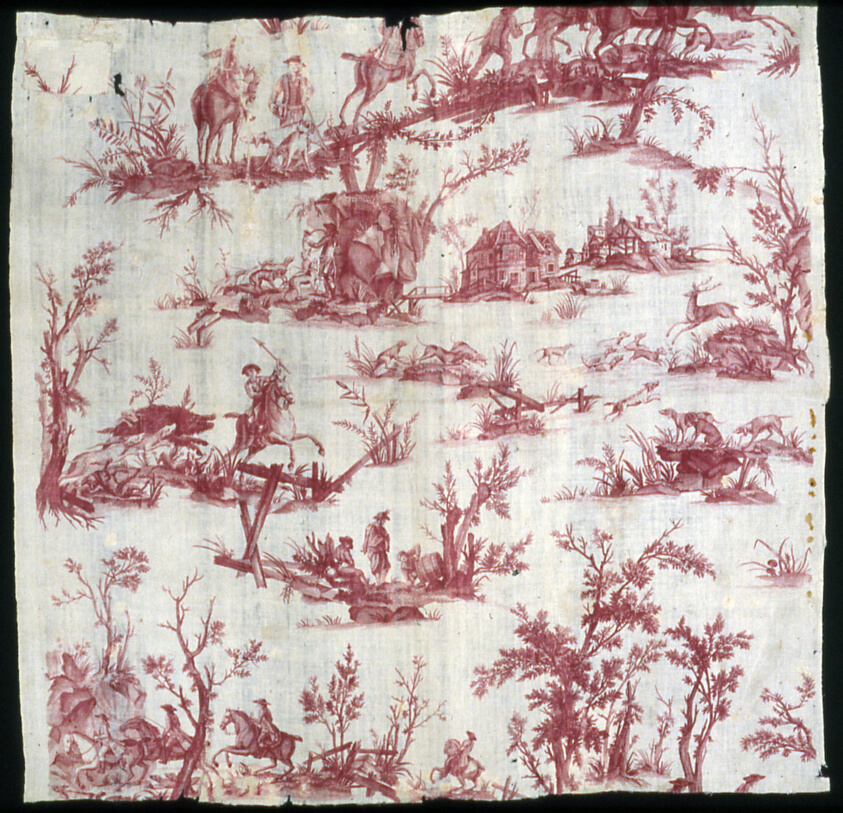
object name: Textile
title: La Chasse au cerf et au sanglier (Furnishing Fabric)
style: jouy-en-Josas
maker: Engraved by Johann Elias Ridinger (German, 1698-1767) and others after Philip Wouverman (Dutch, 1619-1668); Manufactured by Christophe-Philippe Oberkampf (naturalized French, 1738-1815), Oberkampf Manufactory (French, 1760-1843); Jouy-en-Josas, France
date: c. 1780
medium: Cotton, plain weave; copperplate printed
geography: Jouy-en-Josas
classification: textile; weaving - printed; furnishing textile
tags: dogs, animals